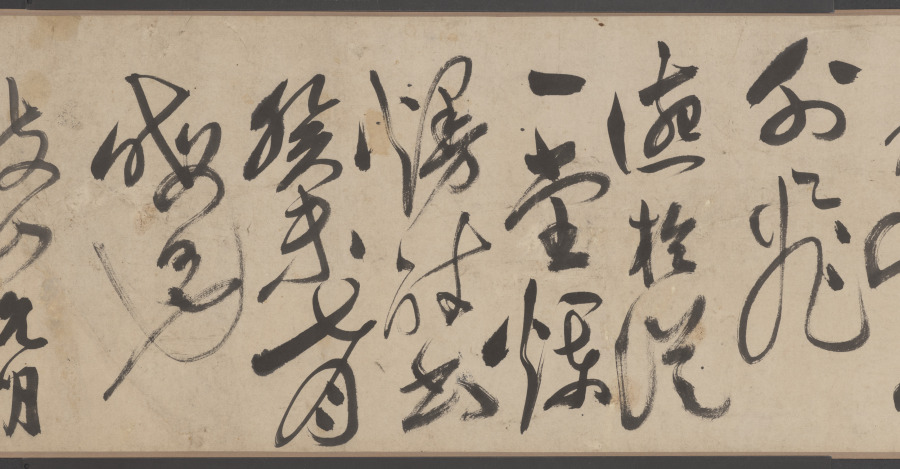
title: Retreat on an Autumn Day, in Cursive Script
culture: China, Ming dynasty (1368–1644)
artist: Zhu Yunming (Chinese, 1460–1527)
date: dated 1523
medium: Handscroll; ink on paper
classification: Calligraphy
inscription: 款識：讌於從一堂，爛漫醉書。癸未（1523）七月晦日也。枝山允明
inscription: 《閒居秋日》逃暑應能蹔閉關，未消多把古賢攀。並拋杯酌方為懶，少事篇章恐礙閑。風墮一庭鄰寺葉，雲開半面隔城山。浮生只說潛居易，隱比求（脫「名」）事更艱。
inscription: 《句曲道中》老至誰憐晝錦明，春來聊得客襟清。宵依星斗宮壇臥，曉（脫「入」）神仙宅舍行。眼看山多城郭少，肩挑詩重簿書輕。何時總入煙霞去。不見人間寵辱驚。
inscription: 《登茆峰》下馬門前一振衣，翠微高迥逼清微。雲端洞裡仙人過，月下山中長史歸。金焰暈牀砂氣伏，紫雲穿竇朮芽肥。神方能詠不能遇，一夜爽靈峰外飛。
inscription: 鈐印：「晞哲」、「允明」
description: This masterwork of calligraphy by Zhu Yunming from Suzhou combines two poems by the artist in cursive script style, characterized by its uninhibited, swift, and intuitive brushwork, so powerful that it here dissolved characters into dots or lines. Written from right to left and top to bottom and alternating in light dry to deep saturated ink, single characters may take a whole column or extend into the next one. Following the movement of the brush, they seem to dance over the paper.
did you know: Zhu Yunming stated that he was in an inebriated state when he created this work.